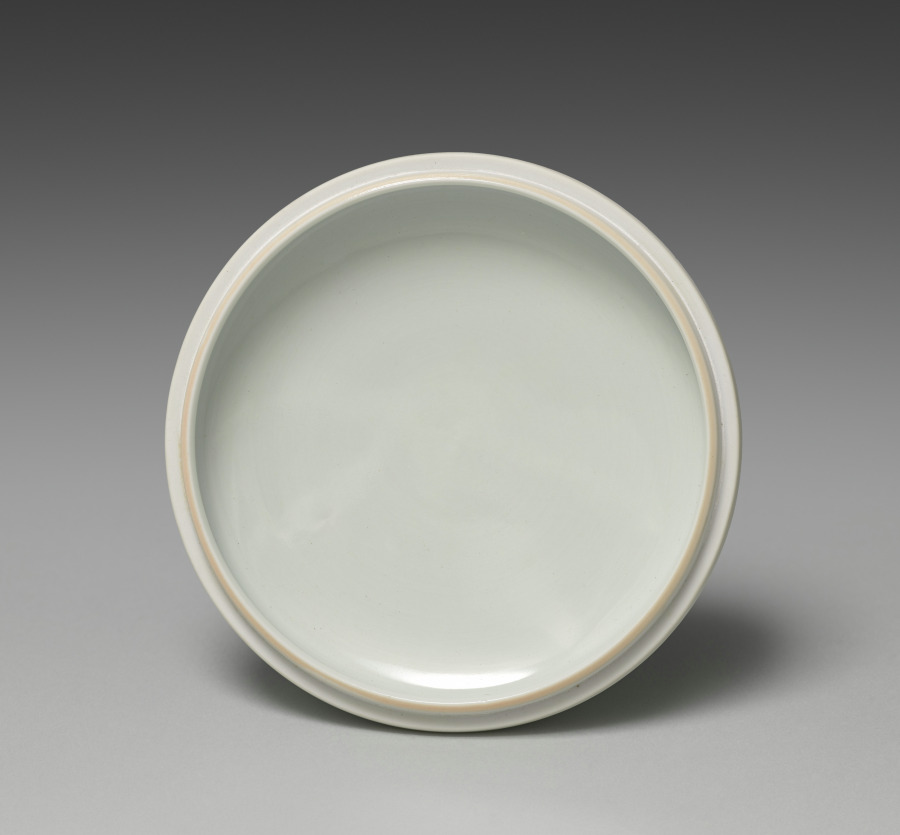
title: Lid for a Jar with Peonies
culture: Japan, Meiji period (1868–1912)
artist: Seifū Yohei III (Japanese, 1851–1914)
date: 1897–1912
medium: Porcelain with underglaze blue, overglaze color enamel, molded decoration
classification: Ceramic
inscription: 大日本清風造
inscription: 金聲玉振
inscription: 帝室技芸員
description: One of Seifū Yohei III’s most visually impactful techniques, seen in this work, was to combine complex low-relief designs in clay surrounded by diffused underglaze blue or pink, which he then covered with a transparent or translucent glaze. Yohei III also experimented with clay bodies ranging from bluish white to ivory combined with translucent cream-colored glazes. The atmospheric effects he achieved were considered remarkable.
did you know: Seifū Yohei III (1851–1914) was a son of the Maruyama school painter Okada Ryōhei (dates unknown).